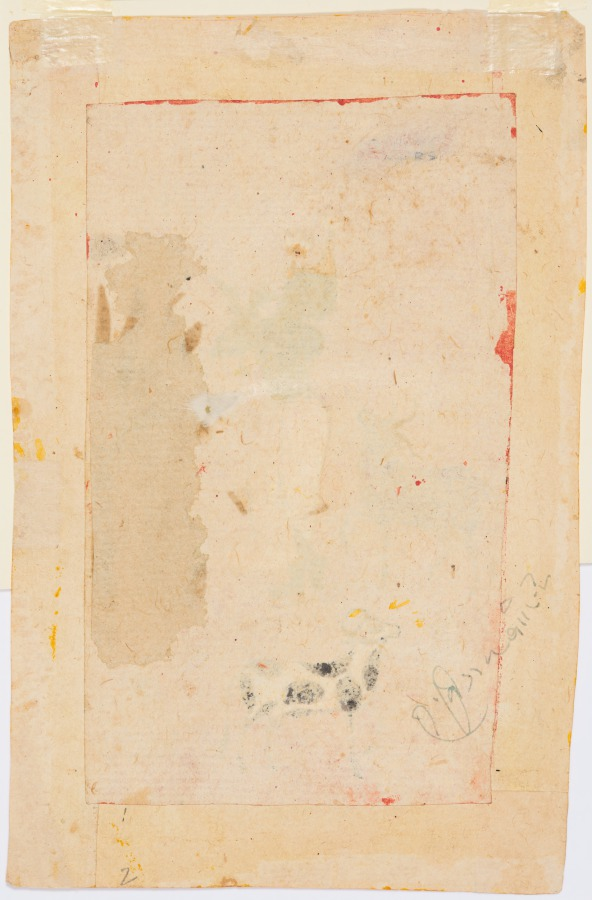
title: Krishna Fluting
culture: Northwestern India, Rajasthan, Rajput Kingdom of Bundi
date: c. 1675–1700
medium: Gum tempera on paper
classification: Painting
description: Brilliantly set off against a flat red ground, Krishna’s blue body is the focus of the brown cow, lured to the god by the melody of his flute. Even the plantain and cypress trees seem to point in his direction. The figural style of the artists of this Rajput kingdom effortlessly shows the head turned in one direction, while the feet point the opposite way, contributing to Krishna’s superhuman appearance. Below, a herdsman struggles to manage a spotted cow in front of a temple with a linga, a stylized phallic form that identifies the presence of the Hindu god Shiva. This fluting scene refers to Krishna’s coming of age as a cowherd.